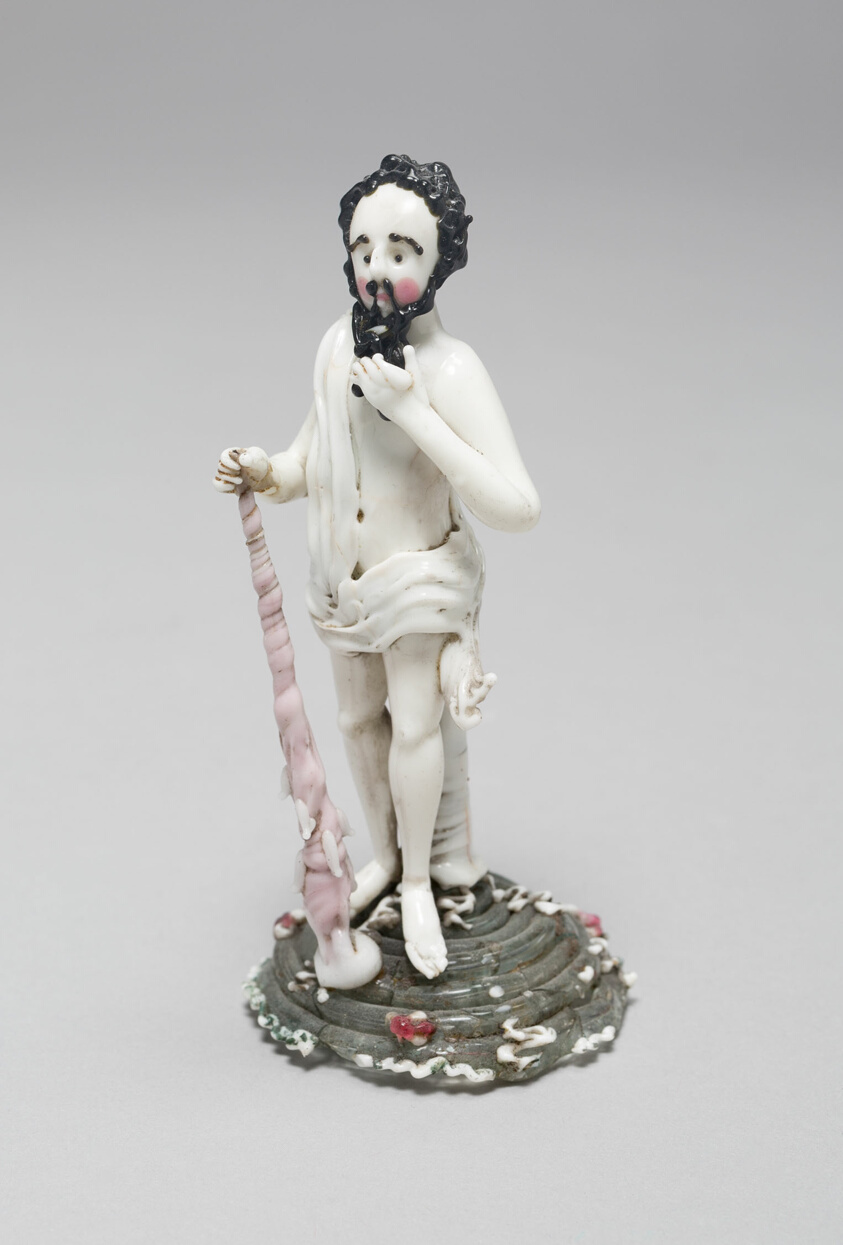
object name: Glass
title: Hercules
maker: Nevers, France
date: Mid 18th century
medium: Glass; lampwork (verre de Nevers), metal armature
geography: France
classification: decorative object/ornament; lampwork; glass; european decorative arts